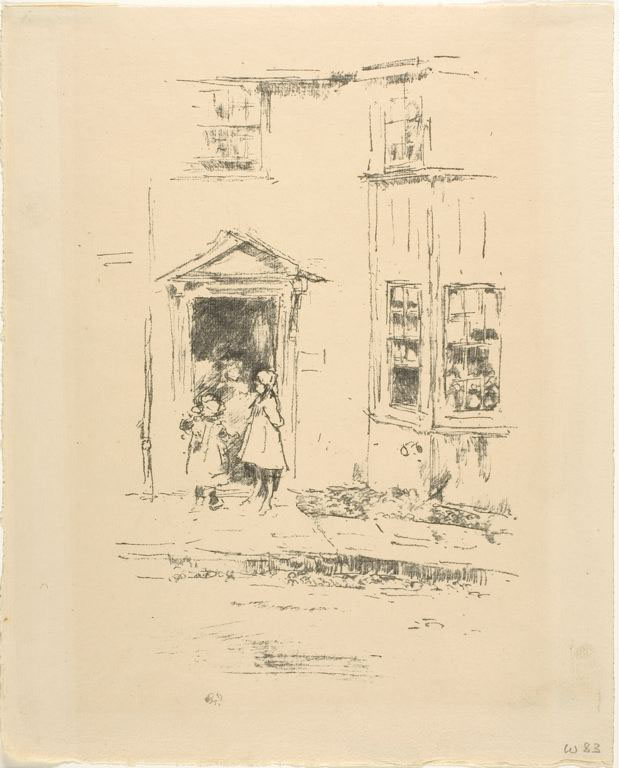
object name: Print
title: The Little Doorway, Lyme Regis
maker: James McNeill Whistler (American, 1834-1903)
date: 1895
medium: Lithograph on cream laid paper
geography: United States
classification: prints and drawing; print; lithograph; paper